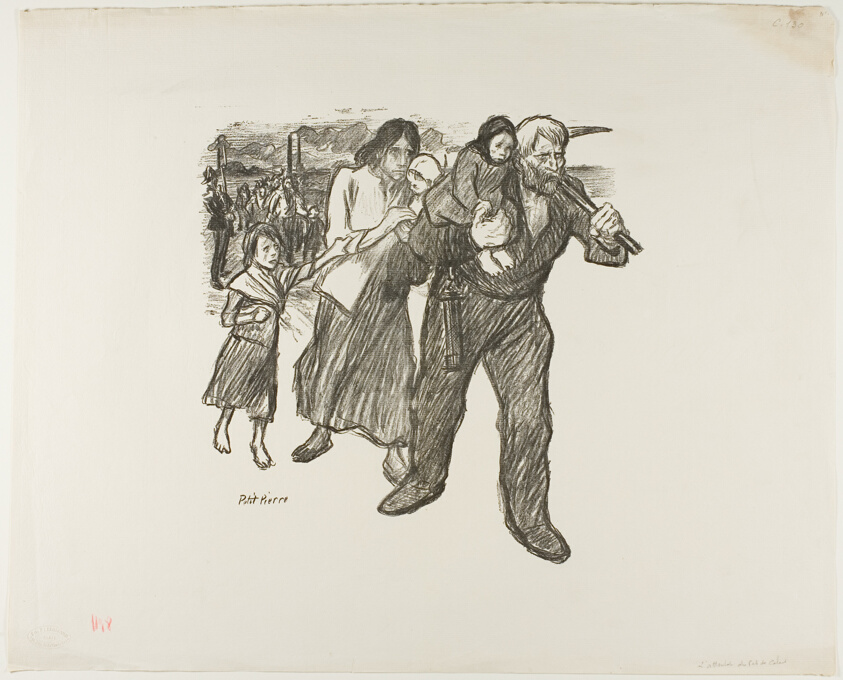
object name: Print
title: Outrage in the Pas-de-Calais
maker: Théophile-Alexandre Steinlen; French, born Switzerland, 1859-1923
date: December 1893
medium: Lithograph in black on off-white laid paper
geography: France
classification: lithograph; print; prints and drawing